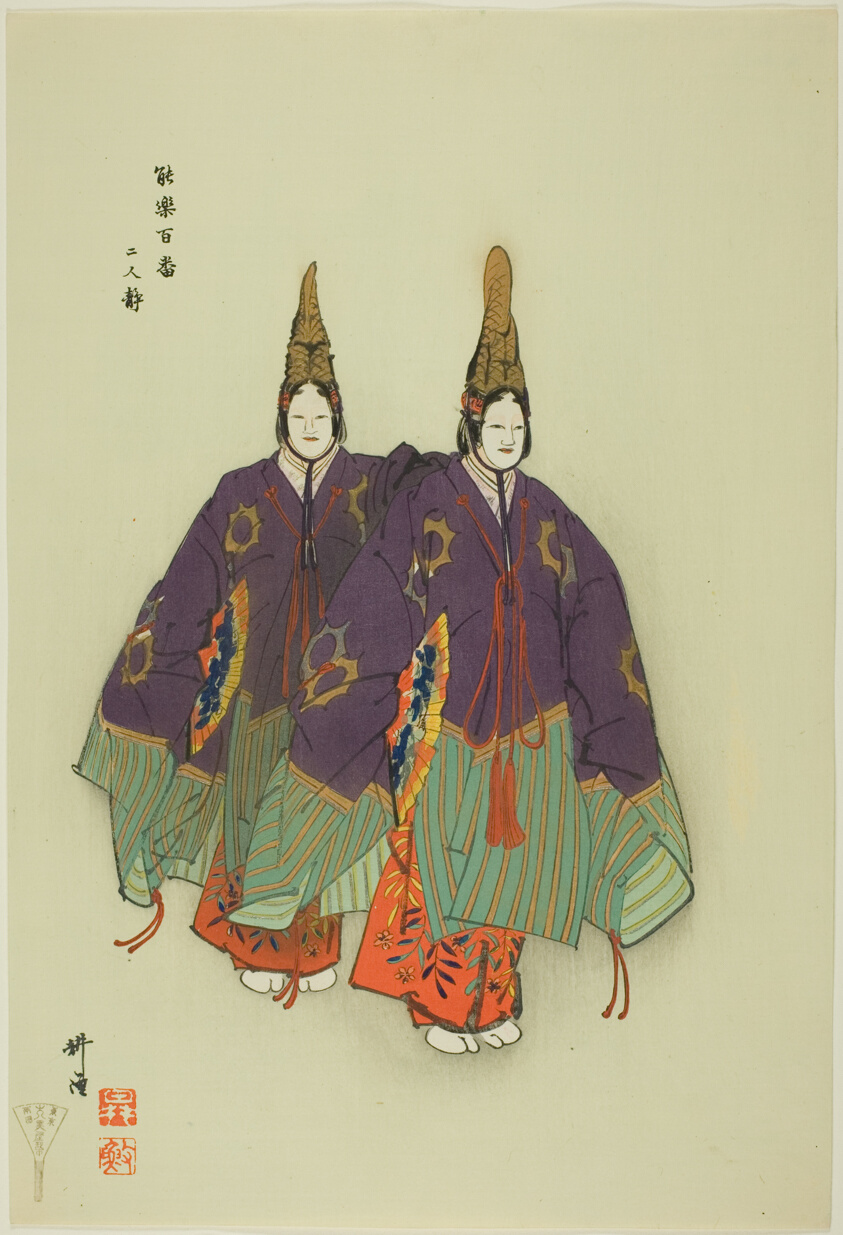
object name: Print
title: Futari Shizuka, from the series "One Hundred No Dramas (Nogaku hyakuban)"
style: Japanese (culture or style)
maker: Tsukioka Kogyo; Japanese, 1869-1927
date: 1898/1903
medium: Color woodblock print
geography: Japan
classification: woodblock print; print; asian art